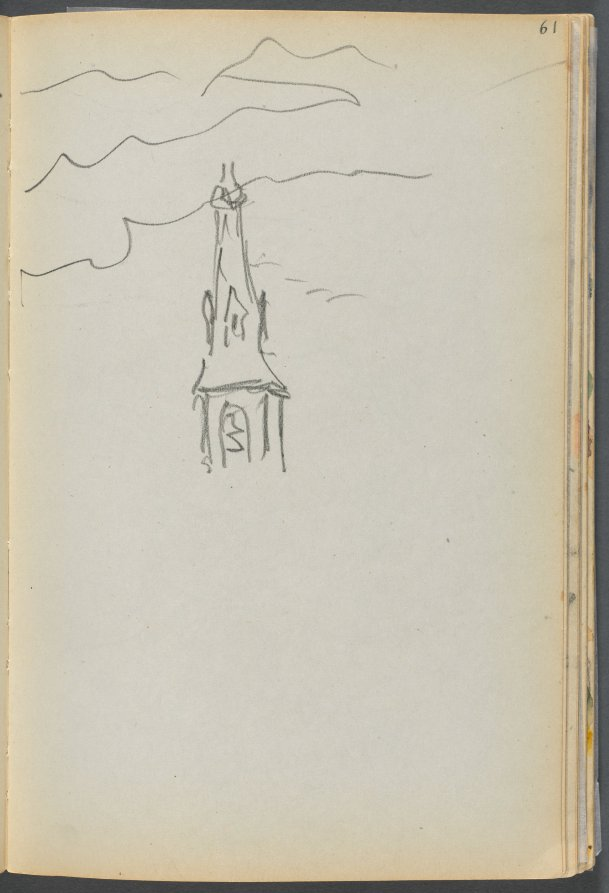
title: Sketchbook- The Granite Shore Hotel, Rockport, page 061: Church Spire with Sky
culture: America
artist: Maurice Prendergast (American, born Newfoundland [now Canada], 1858–1924)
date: 1905–10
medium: graphite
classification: Bound Volume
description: This sketchbook contains 72 pages of pencil drawings and 9 watercolors of Cape Ann. On the inside of the cover Prendergast wrote the address of the Granite Shore Hotel in Rockport, Massachusetts.